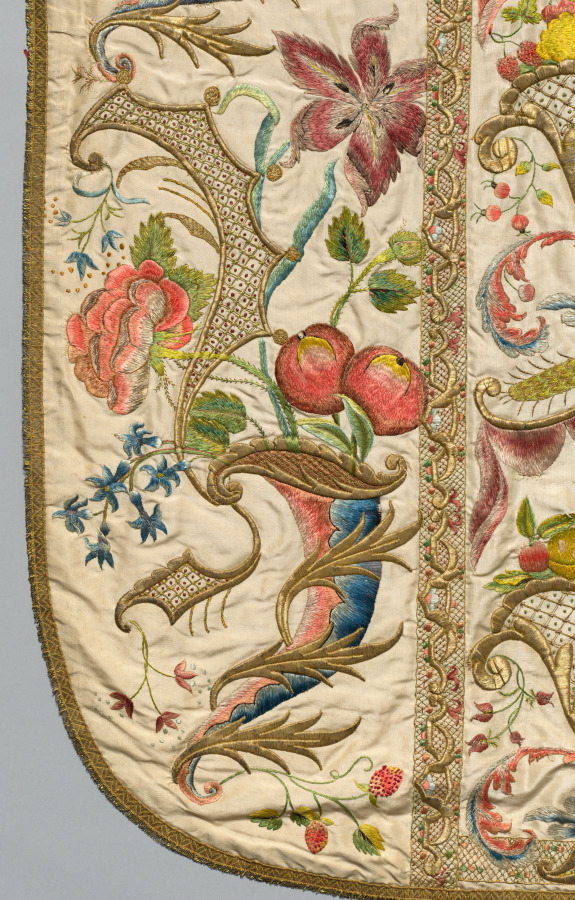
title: Chasuble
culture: Italy or Spain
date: 1700s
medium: Silk and metallic threads: embroidery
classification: Embroidery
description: The chasuble’s exquisite symmetrical decoration highlights its central panel where three illusionary gold containers hold skillfully shaded fruit in pastel silk tones. Delicately curving motifs enhance the side panels along with finely stitched strawberries in so-called French knots. This liturgical chasuble and other vestments, worn over a white alb with lace, were embroidered by professional specialists, such as experts who shaded colored silks or secured gold thread, in early versions of assembly lines that were usually in secular workrooms or in convents. The church or commissioner supplied the raw materials and paid a fee for the work.